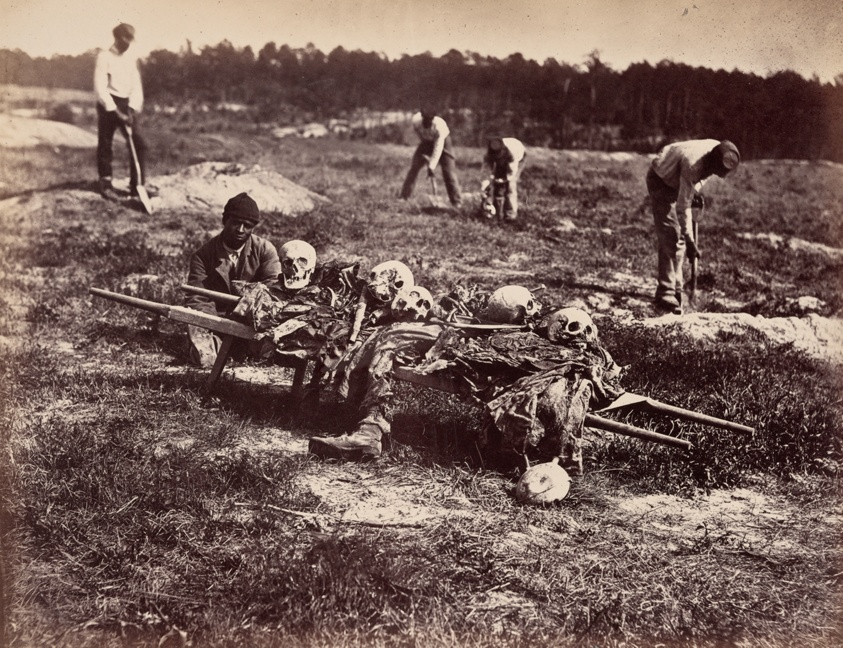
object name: Photograph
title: A Burial Party, Cold Harbor, Virginia, pl. 94 from the album "Gardner's Photographic Sketch Book of the War, Volume II" (1866)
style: 19th century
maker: John Reekie (American, active 1861–1865)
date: April 1865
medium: Albumen print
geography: United States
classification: albumen silver print; photographic process; photography; photograph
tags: Collected by Hugh Edwards, Gardner's Photographic Sketch Book